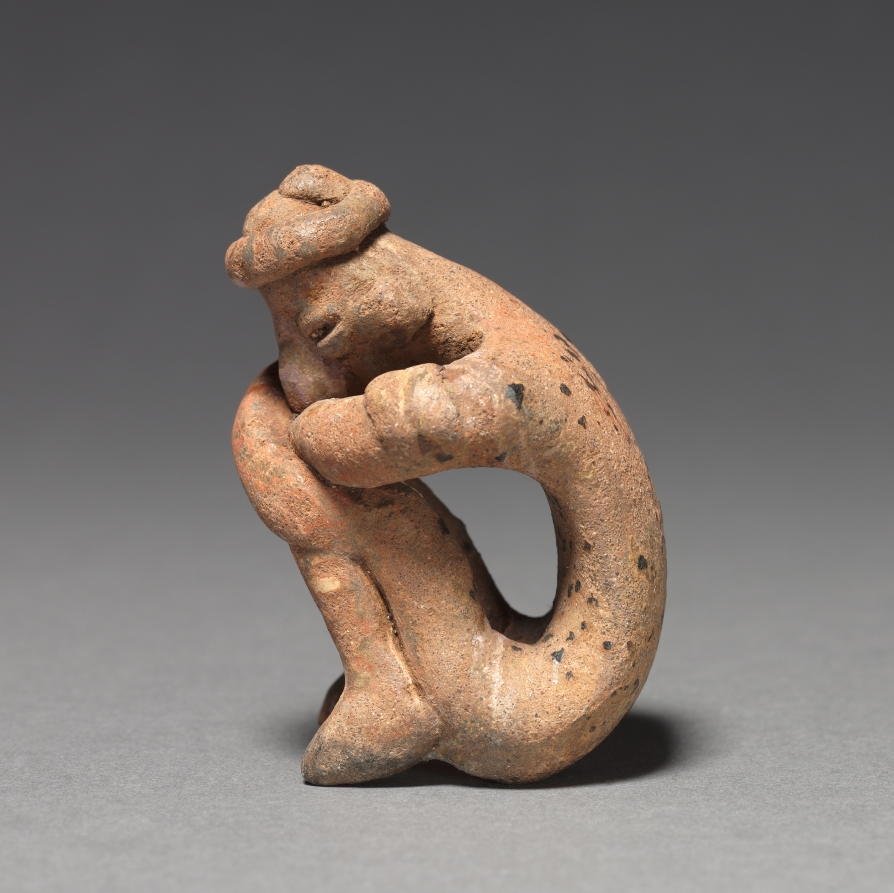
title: Seated Male Figurine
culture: Mesoamerica, Veracruz, Remojadas Style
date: 500–900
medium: ceramic, pigment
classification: Sculpture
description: Clay figurines were the earliest and most common art form in Mexico and other countries in the ancient Mesoamerican (Middle American) culture region. Made first by hand and later with molds, most figurines belong to the traditions of commoners, such as farmers, rather than those of elites.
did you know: Clay figurines were the earliest, most common art form in the ancient Mesoamerican culture region.